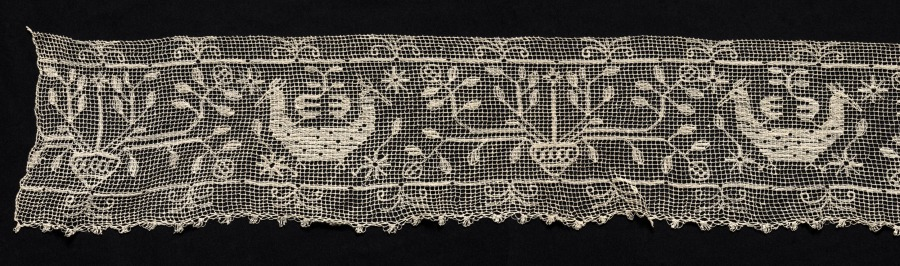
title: Border with Double-Headed Birds and Vases with Vines and Flowers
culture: Italy, Sardinia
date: 1800s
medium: Bleached linen (est.): needle lace, filet/lacis (knotted ground and darned in one direction)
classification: Lace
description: Double-headed birds alternating with flowering vases appear on this filet/lacis lace. The pattern repeats horizontally, with organic spirals which burst into the upper and lower registers.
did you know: This lace was given to the museum by Louise Tifft Brown, a native Clevelander who became an expert in lace while living in Venice for 35 years.